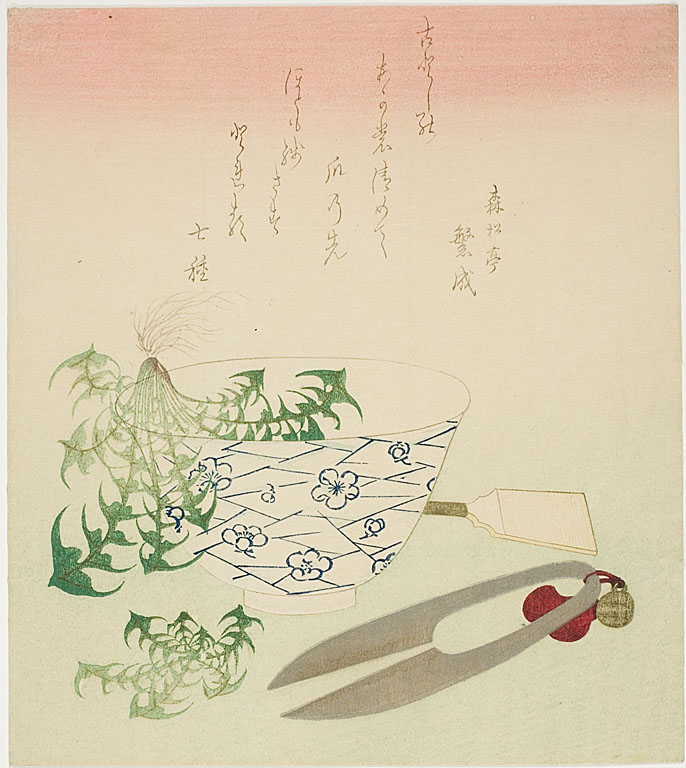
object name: Print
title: Dandelions for the New Year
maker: Attributed to Katsushika Hokusai; Japanese, 1760-1849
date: 19th century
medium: Color woodblock print; surimono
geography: Japan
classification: woodblock print; print; asian art